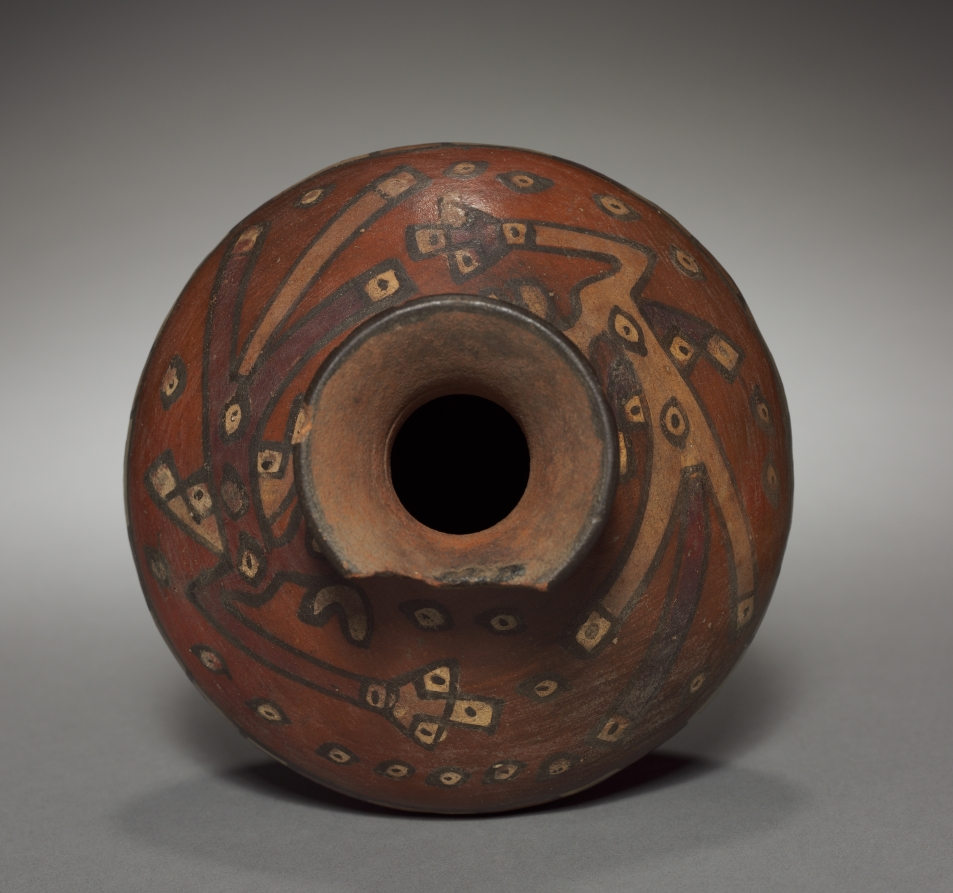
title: Vessel with Bird Designs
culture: Peru, South Coast, Middle Horizon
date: 700–1000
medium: pottery with burnished, colored slips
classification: Sculpture